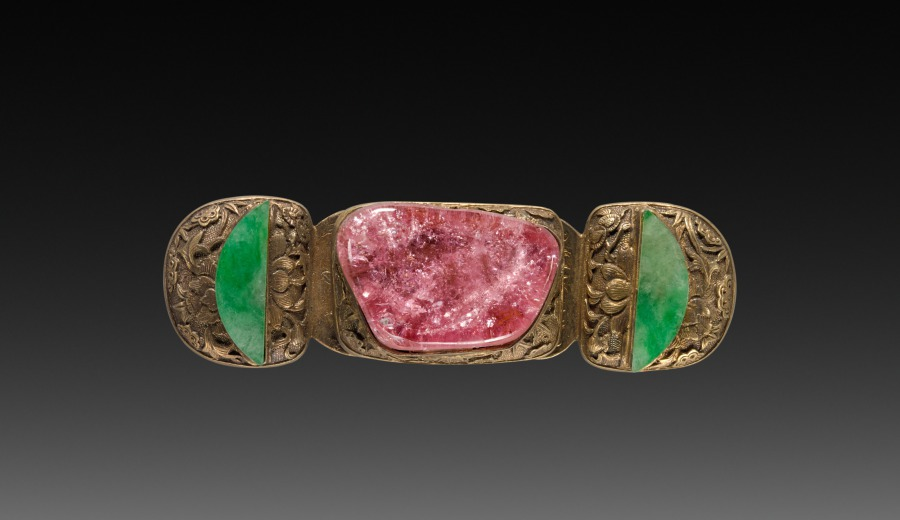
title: Buckle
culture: China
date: 1900s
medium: gilt brass, engraved and set with green jade and rose quartz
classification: Jewelry